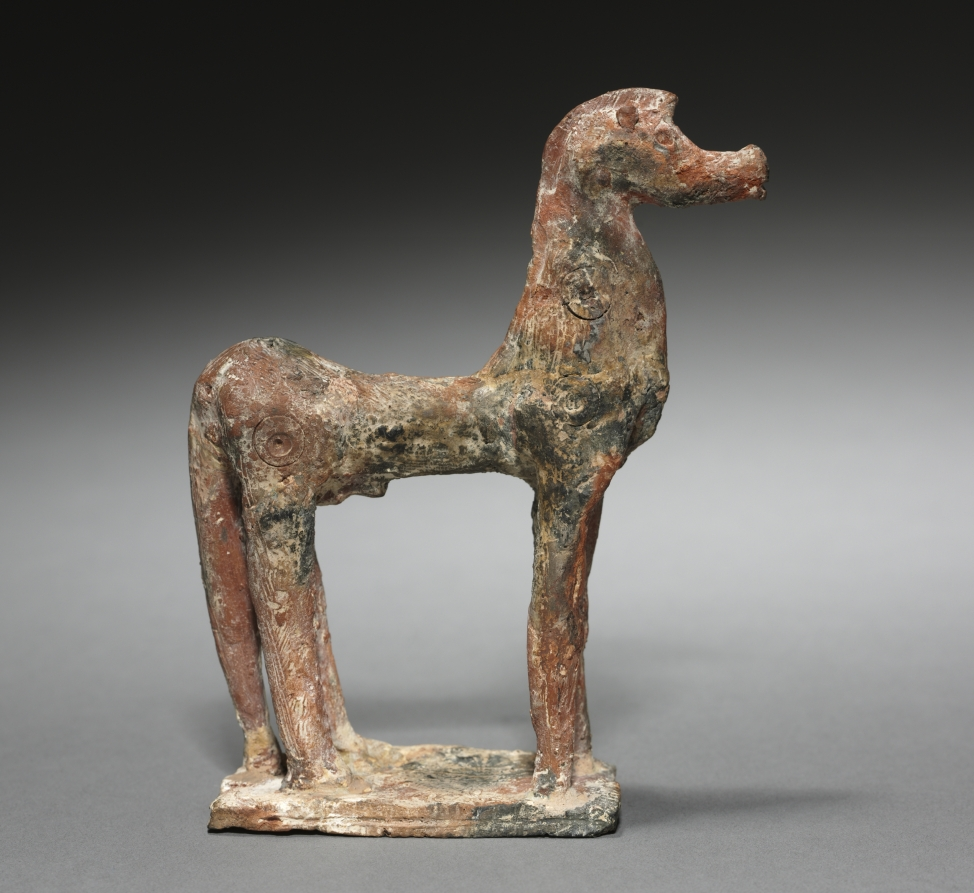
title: Horse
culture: Greece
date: c. 750–725 BCE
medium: terracotta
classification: Sculpture